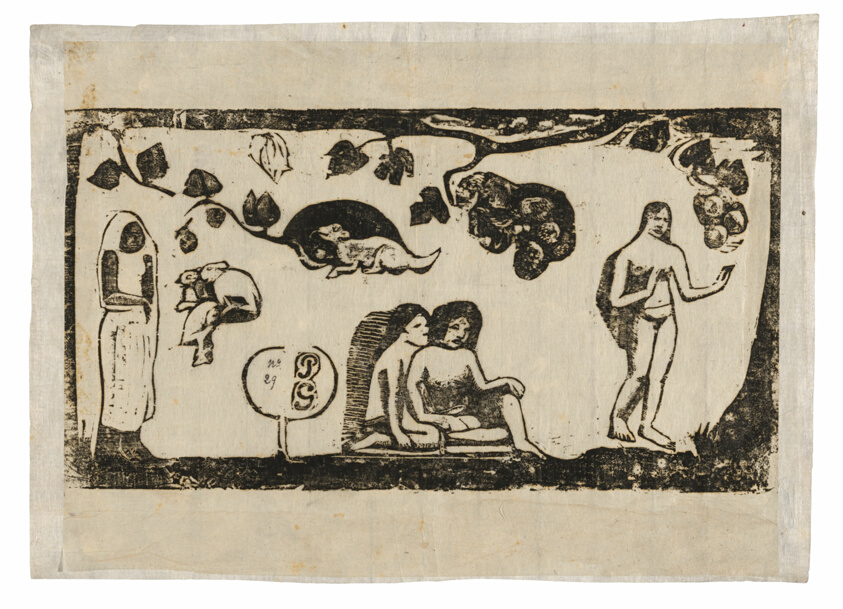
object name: Print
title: Women, Animals, and Foliage, from the Suite of Late Wood-Block Prints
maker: Paul Gauguin (French, 1848-1903)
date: 1898/99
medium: Wood-block print in black ink on thin ivory Japanese paper, partially laid down on thin white Japanese paper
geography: France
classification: woodcut; print; prints and drawing